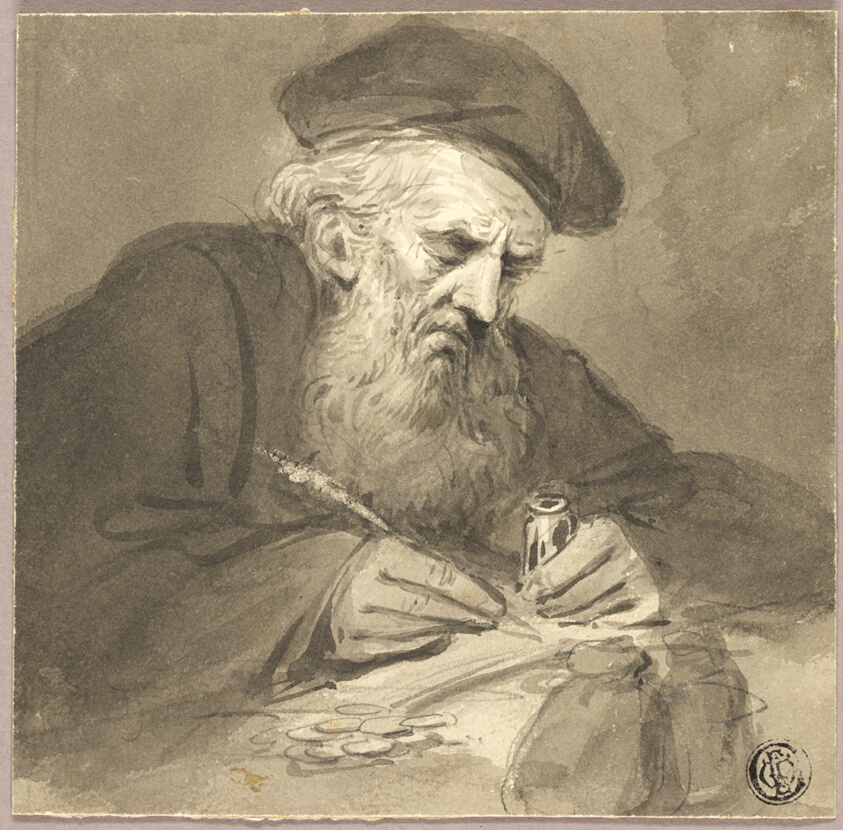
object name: Drawing and Watercolor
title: Bearded Scholar Writing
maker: Attributed to Edward Bird; English, 1772-1819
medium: Brush and black and gray wash, with graphite and traces of black chalk, on cream wove paper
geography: England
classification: ink or chalk wash; brush and wash; paper; drawings (visual works); prints and drawing